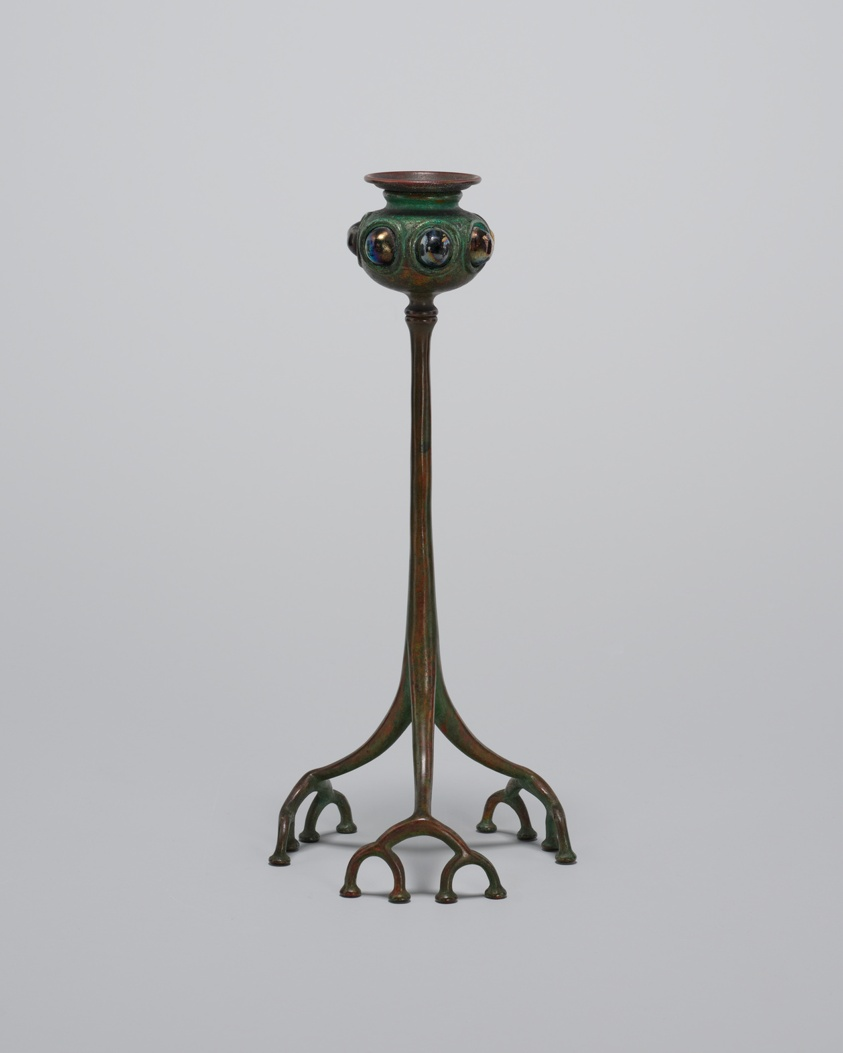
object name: Metalwork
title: Candlestick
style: Arts and Crafts Movement, 20th Century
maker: Tiffany Studios (American, 1902–32); Corona, New York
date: c. 1910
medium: Bronze and Favrile glass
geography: Corona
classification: candleholder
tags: candleholder, root